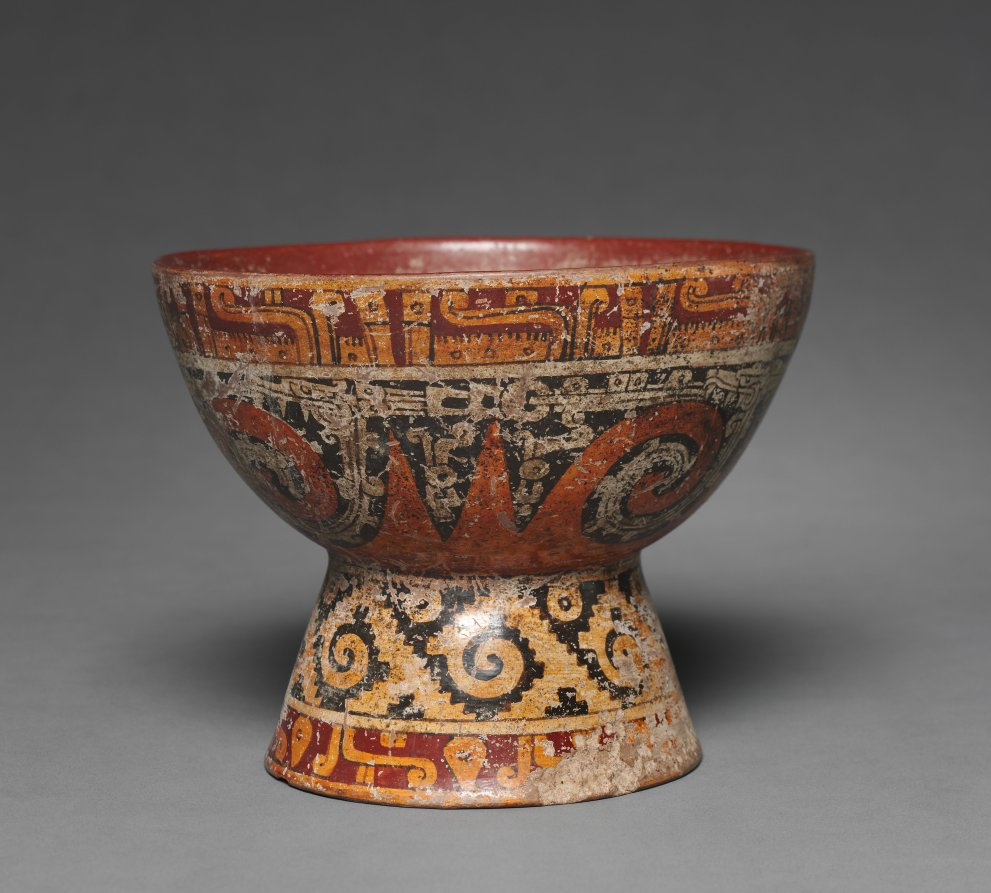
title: Pedestal Bowl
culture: Mexico, Cholula?, Mixteca-Puebla Style, 10th-16th century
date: c. 900–1519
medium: earthenware with colored slips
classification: Ceramic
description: The nobility may have used these goblets for a chocolate beverage or for pulque, made from the fermented sap of the maguey cactus. Both are painted with the precision and brilliant colors for which the Mixteca-Puebla style is renowned, and they carry some of the same motifs, such as the band of stylized animal heads at the top. The smaller bowl has a rattle base.